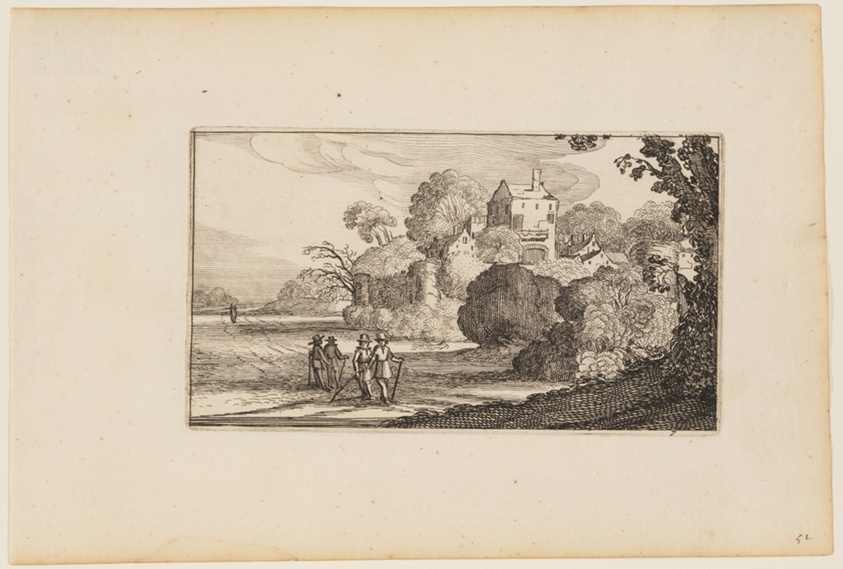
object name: Print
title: Path to Left of Walled Building Complex Amid Trees, from Twelve landscapes with Figures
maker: After Gillis van Scheyndel; Dutch, 1595–1660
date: 1624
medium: Etching on ivory laid paper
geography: Netherlands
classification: etching; paper; print; prints and drawing